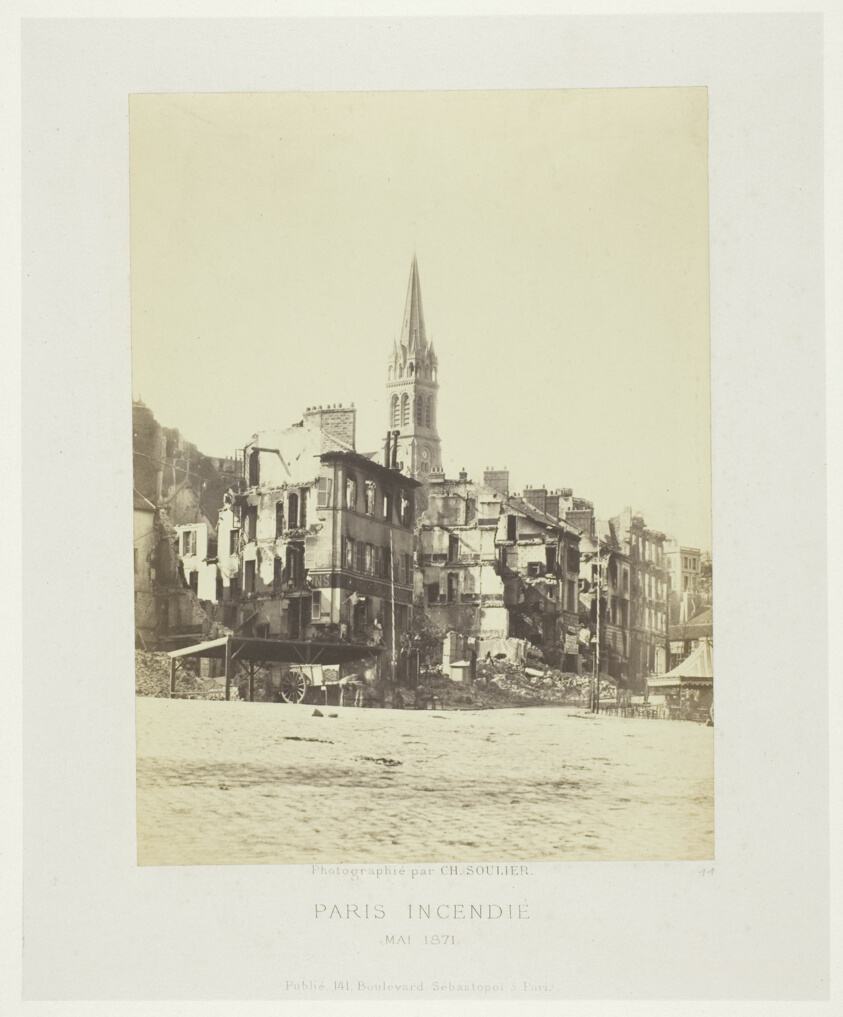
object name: Photograph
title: Paris Fire (Place de Saint-Cloud), from the series "Paris Incendié"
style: 19th century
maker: Charles Soulier (French, 1840–1875)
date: May 1871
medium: Albumen print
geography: France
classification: gelatin silver (developing-out-paper) pr; photographic process; photography; photograph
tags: Collected by Hugh Edwards, Paris